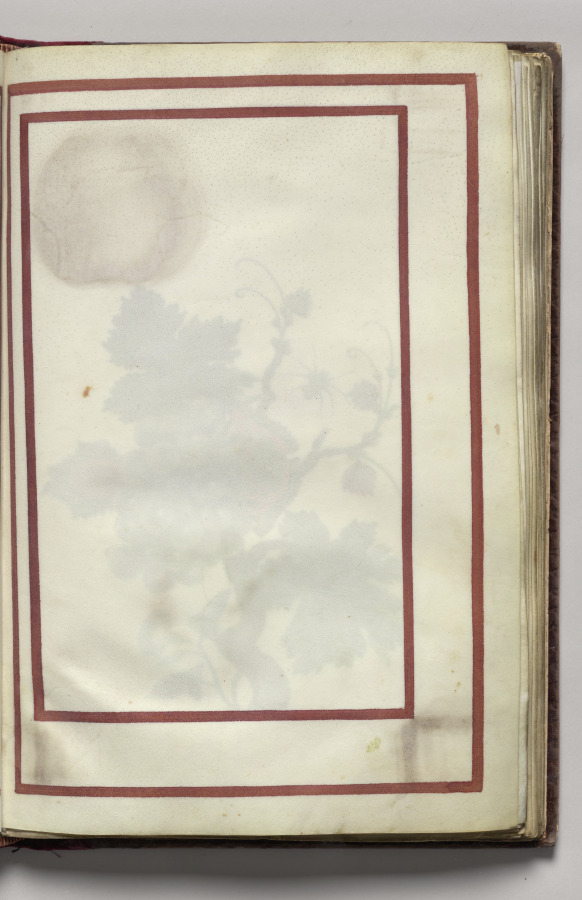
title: Border, folio 10 (recto), from Florilegium (A Book of Flower Studies)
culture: France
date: 1608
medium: watercolor, ink, silver and gold over occasional traces of pencil, on vellum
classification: Bound Volume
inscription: Dated: Poitiers 1608 (on frontispiece) Signed: On frontispiece in black ink, lower right: Van Kuyk Notation on drawing: Frontispiece: in pencil, lower margin: * élève de Van Kessel, peintre flammand (* in pencil also appears in front of Van Kuyk's name).